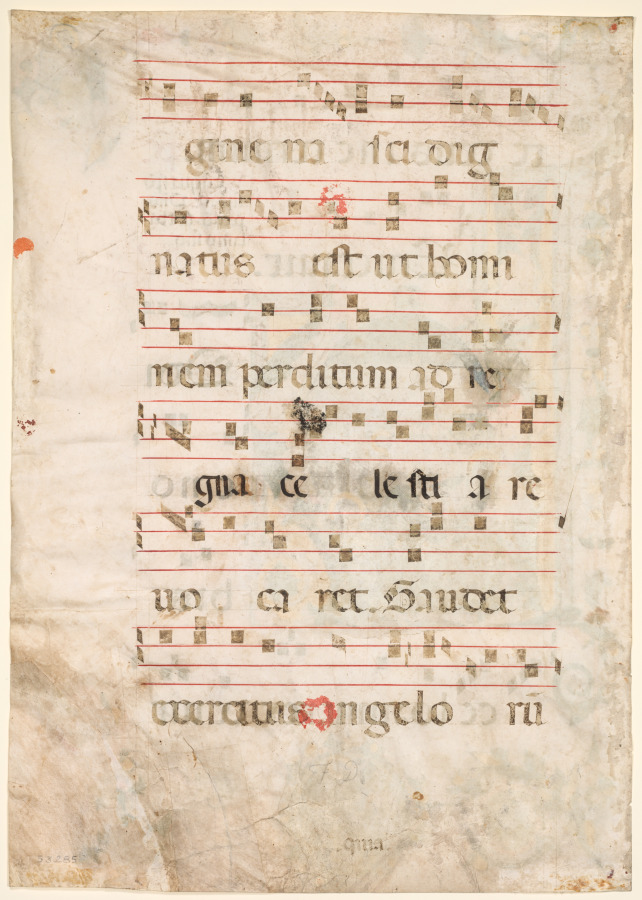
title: Leaf from an Antiphonary: Music (verso)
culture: Italy, Tuscany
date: early 1300s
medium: ink, tempera, and gold on parchment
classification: Manuscript